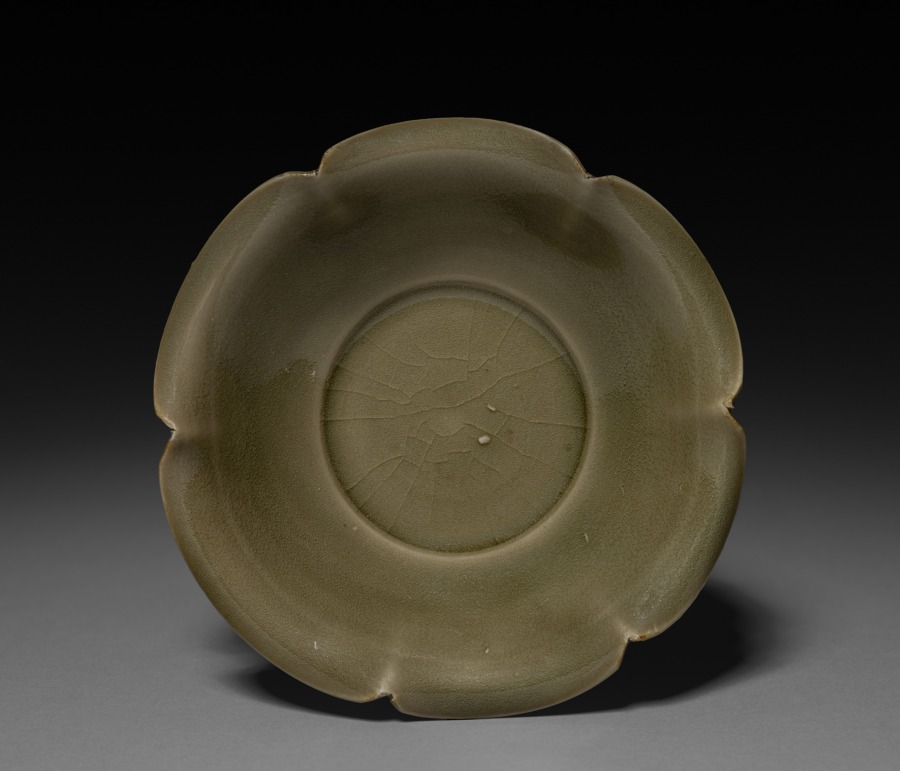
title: Foliated Saucer: Yaozhou Ware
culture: China, Shaanxi province, Northern Song dynasty (960-1127)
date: late 1000s-early 1100s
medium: glazed porcelain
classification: Ceramic